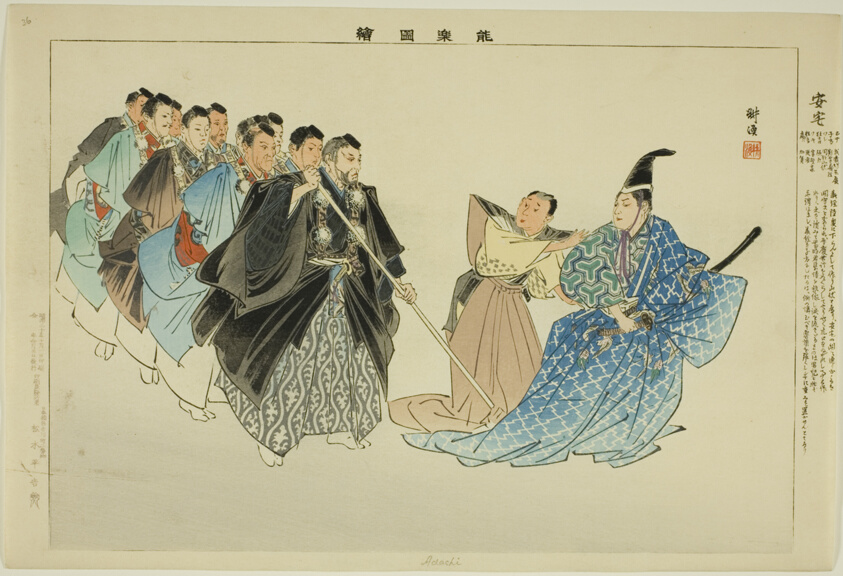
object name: Print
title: Adachi, from the series "Pictures of No Performances (Nogaku Zue)"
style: Japanese (culture or style)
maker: Tsukioka Kogyo; Japanese, 1869-1927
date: 1898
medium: Color woodblock print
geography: Japan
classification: woodblock print; print; asian art